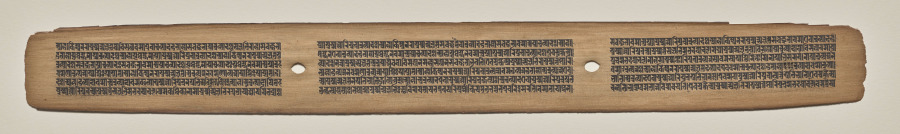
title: Text, Folio 11 (recto), from a Manuscript of the Perfection of Wisdom in Eight Thousand Lines (Ashtasahasrika Prajnaparamita-sutra)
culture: Eastern India, Bihar, Vikramashila Monastery. Painting: Nepal, Kathmandu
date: Sunday, September 14, 1119 (year 239 of the Newar Samvat in the month of Ashvina)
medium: gum tempera and ink on palm leaves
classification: Painting